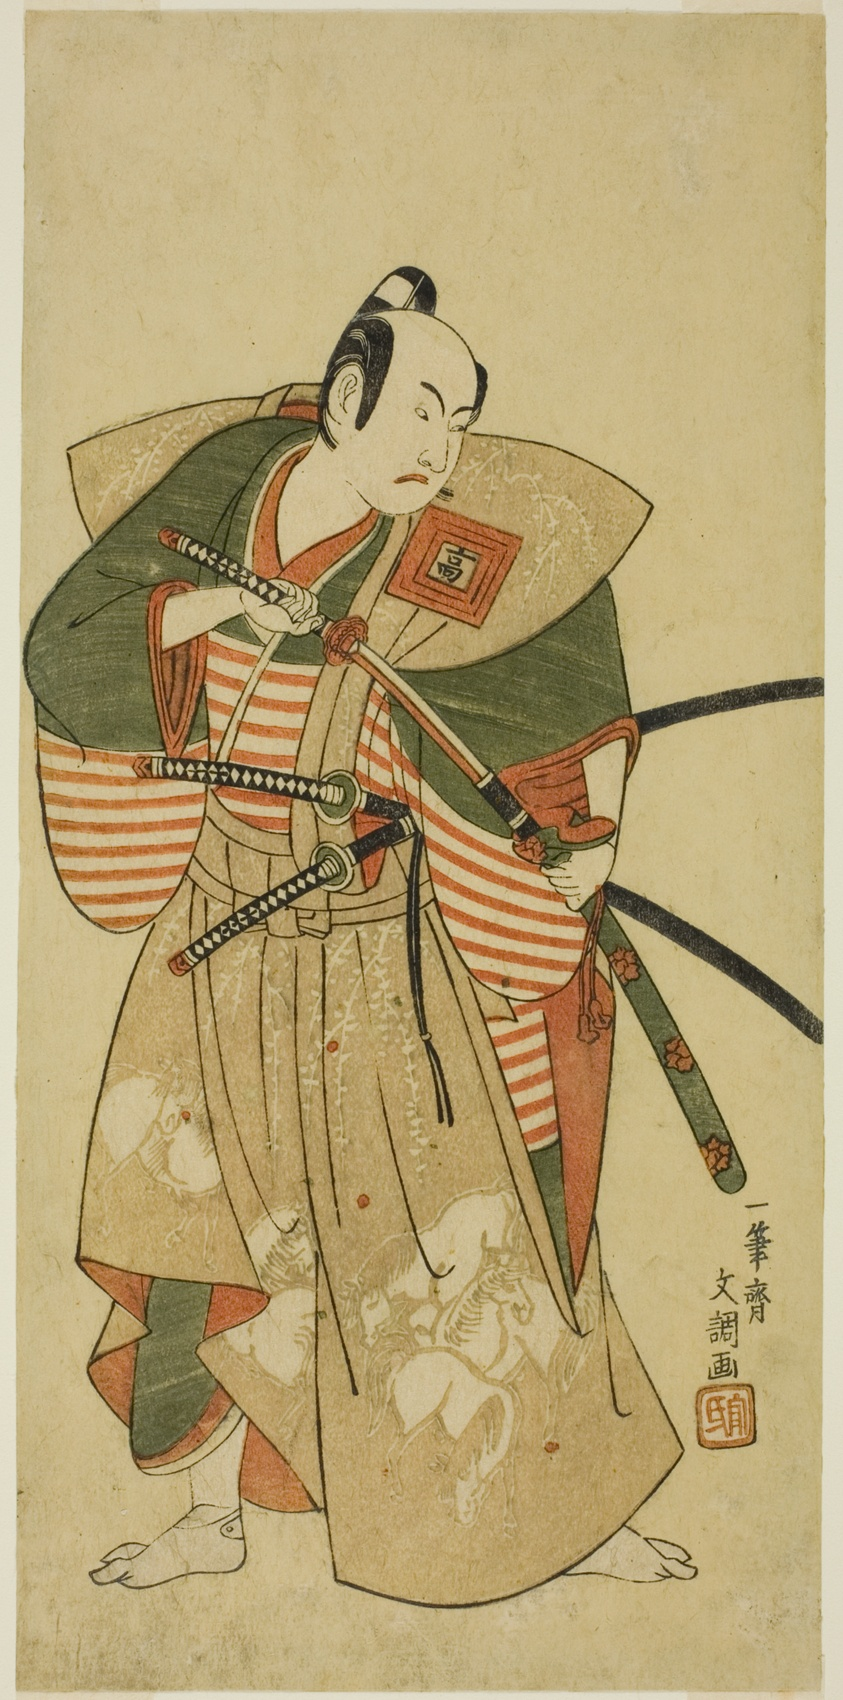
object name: Print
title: The Actor Ichikawa Komazo II as Kudo Saemon Suketsune (?) in the Play Haru wa Soga Akebono-zoshi (?), Performed at the Nakamura Theater (?) in the First Month, 1772 (?)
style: Japanese (culture or style)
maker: Ippitsusai Buncho (Japanese, active c. 1755-90)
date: c. 1772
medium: Color woodblock print; hosoban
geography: Japan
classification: woodblock print; print; asian art